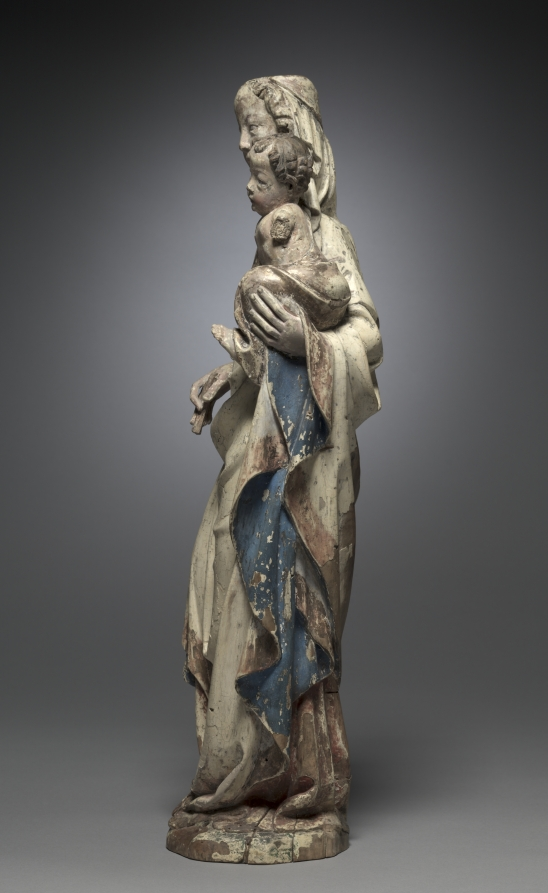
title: Virgin and Child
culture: Austria, Diocese of Passau, 14th century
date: c. 1370–1380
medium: painted lindenwood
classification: Sculpture